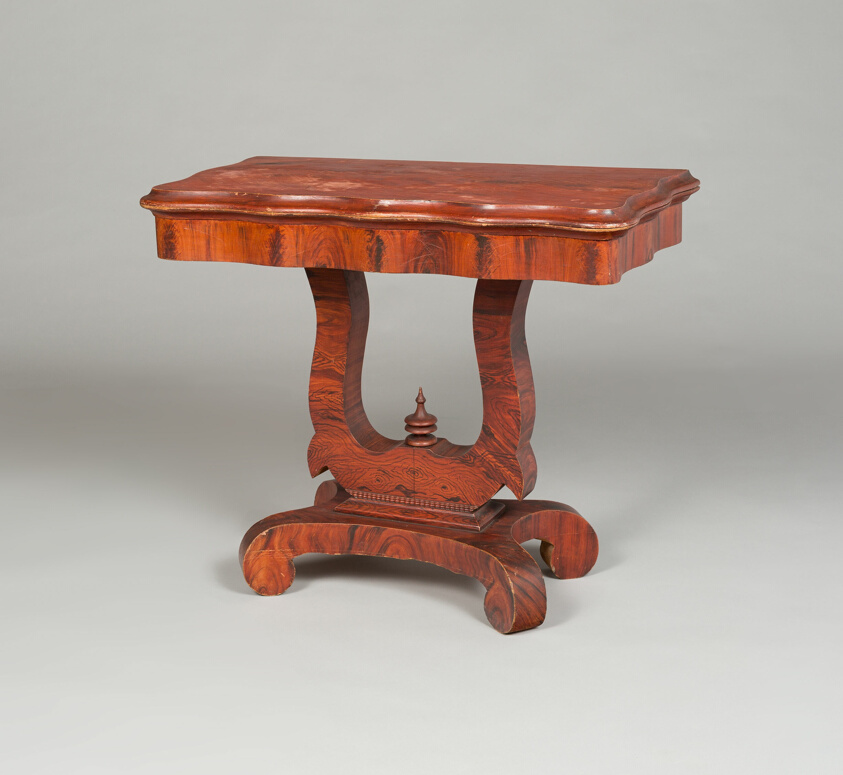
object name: Furniture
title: Card Table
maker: Artist unknown (American, 19th century); Maine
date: 1835–50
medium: White pine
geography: Maine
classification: table; furniture; american decorative arts; american arts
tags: furniture